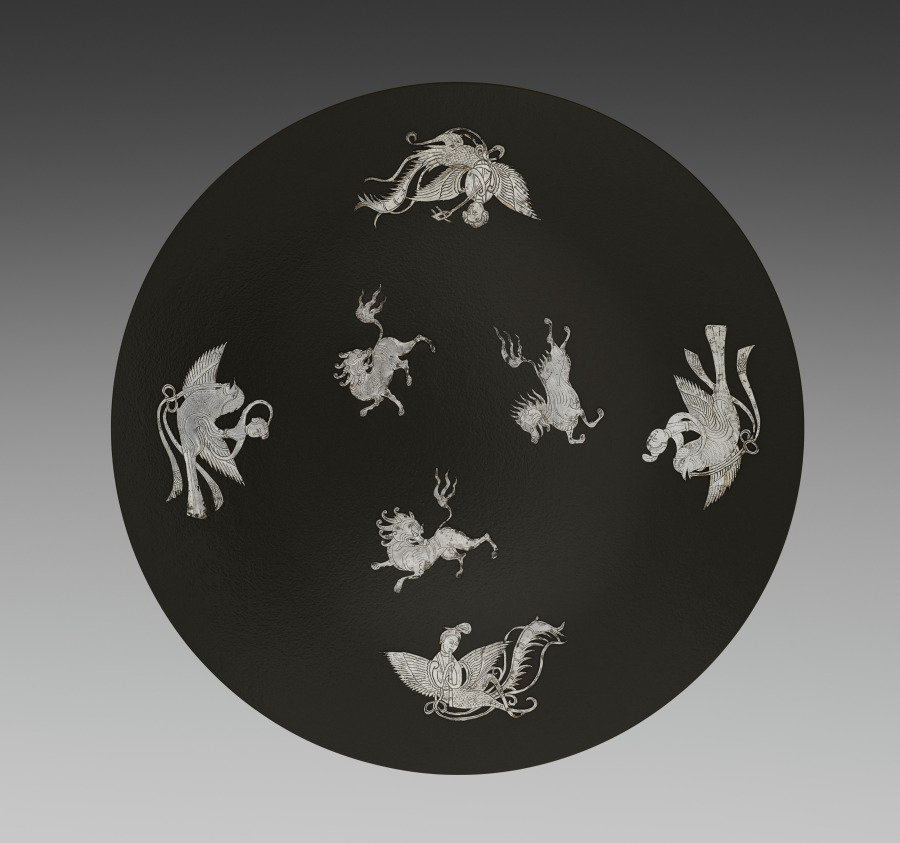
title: Inlays for a Mirror or Box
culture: China, Tang dynasty (618-907) - Song dynasty (960-1279)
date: c. 900–1000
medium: beaten silver with chased details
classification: Metalwork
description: The p'ing-t'o technique of inlaying gold and silver foil on lacquer produced luxurious articles of elegance and fragility. These stray silver inlays were originally mounted on a mirror back or a cosmetic box whose lacquered surface has disintegrated. They combine auspicious symbols of Indian and Chinese origin: human-headed birds whose melodies filled the Buddhist paradise, and bird-riding deities who inhabited the skies of Taoist mythology. Like these imaginary beings, the lions were probably paired in a radial design; at least one has been lost.